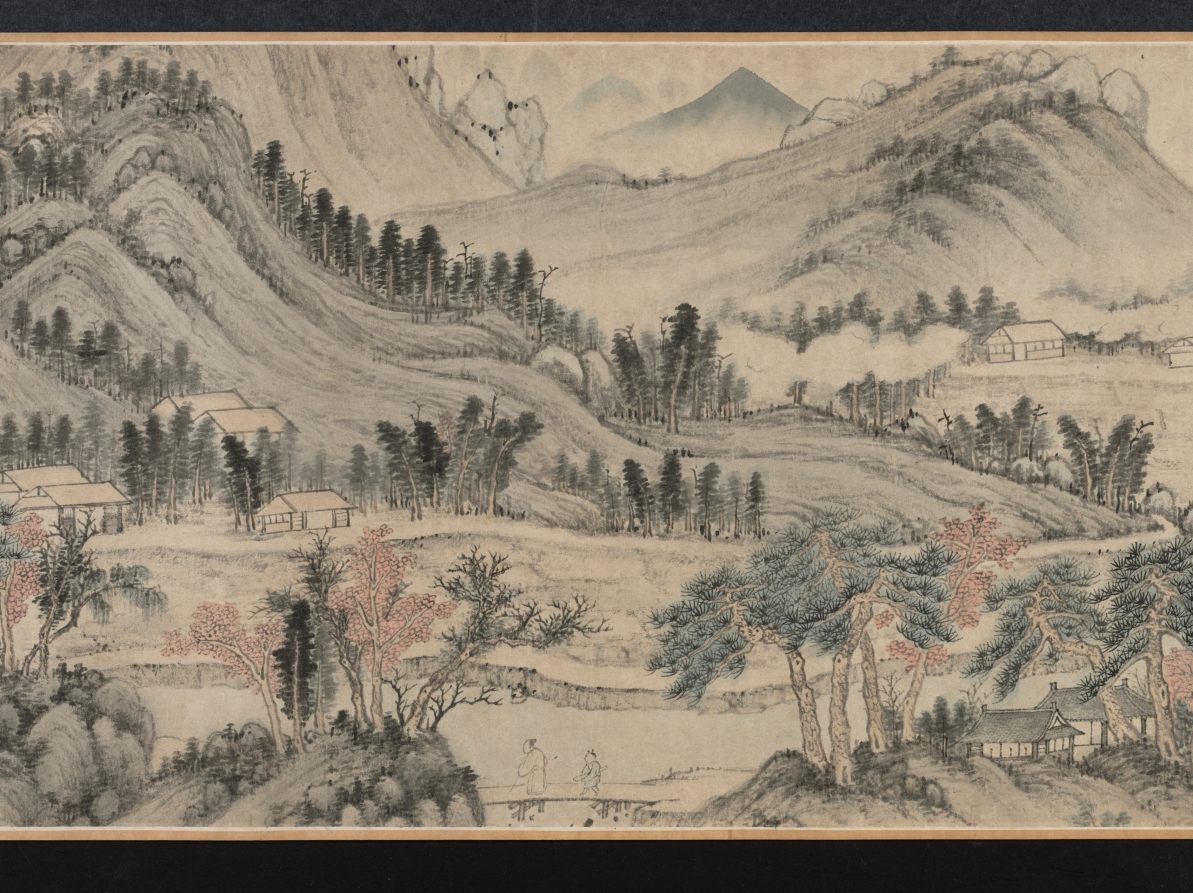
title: Mt. Taibo in the Style of Wang Meng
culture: China, Ming dynasty (1368–1644)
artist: Du Qiong (Chinese, 1396–1474)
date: 1442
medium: handscroll; ink and light color on paper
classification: Painting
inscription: Artist's inscription, signature, and 11 seals: [1 seal] Tung-yüan chai. Huang-ho-shan-ch'iao [Wang Meng] painted a painted called T'ai-po Mountain. Its brushwork is superior and admirable, which is very close to Yu-ch'en [Wang Wei, 699-759]. The cleverness of its composition, the maple groves and rustic temples, the inaccessible ravines and autumnal plateaus, the periolous peaks and strange rocks, etc., all seem to be so natural. The paper is only a little over eight feet, but the landscape has the range of a thousand miles. Once you open and note the contents, it is as if one were roaming among the mountain peaks enveloped in mist and clouds, and forgot the dusty world. When I first saw this, I was so mixed with excitement and joy that I could not take my hands off the painting. So I put it on the table, and tried my best to imitate it, forgetting sleeping and eating for about three months before it was completed. Although I do not dare to tread in the footsteps of Huang-ho shan ch'iao, I took great pains to capture his spirit in composition and colors. I do not know whether it would pass the judgment of the experts. On the fifteenth day of the fifth month, the seventh year of the Cheng-t'ung year [1442], inscribed by Tung-yüan, Tu Chiung. [2 seals] Yung-chia; Ching-chieh ming-men. [8 seals on painting] Tung-yüan chai; Ching-chieh ming-men; Yung-chia; Tu Ch'iung yin; Tung-yüan (repeated 5 times). trans. WKH/LYSL 3 colophons and 7 additional seals: 1 colophon and 2 seals of Chou Ting (1401-1487); 1 colophon and 2 seals of Wu K'uan (1435-1504); 1 colophon, dated 1655, and 2 seals of Lan Ying (1585-after 1664).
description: When a Chinese painter "imitated" a painting by a past master, the intention was never to produce an exact copy. Du Qiong, the Ming painter from Suzhou, is a case in point. The painting style of this handscroll is actually closer to that of Huang Gongwang (1269–1354) than to the style of Wang Meng (about 1301–1385). Both masters were active during the previous dynasty and are among the so-called Four Great Masters of the Yuan dynasty (1279–1368). In this painting, the interplay of styles, including Du Qiong's own, contribute to an inner dimension that is more than visual. Mt. Taibo is located in the province of Zhejiang and is known for its scenic beauty. In this scroll, however, it is not depicted literally. The image is an ideal representation of mountains in southeastern China.